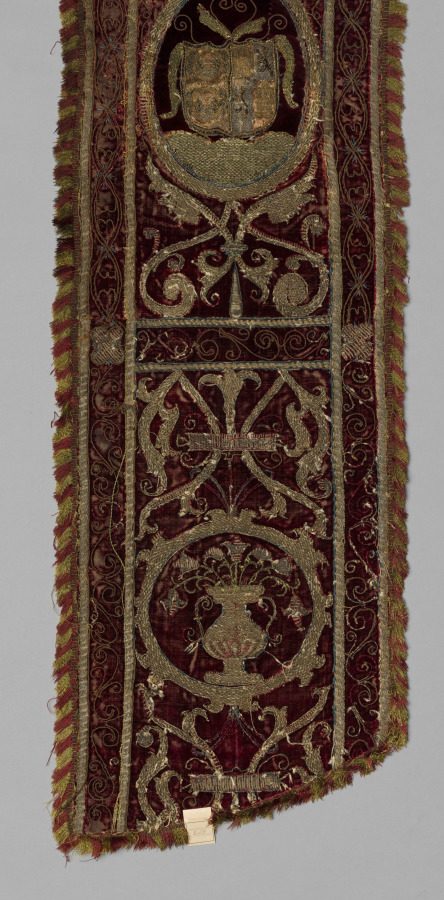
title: Embroidered Strip of Velvet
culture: Spain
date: 1500s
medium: embroidery: silk and gold thread on velvet, fringe border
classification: Velvet